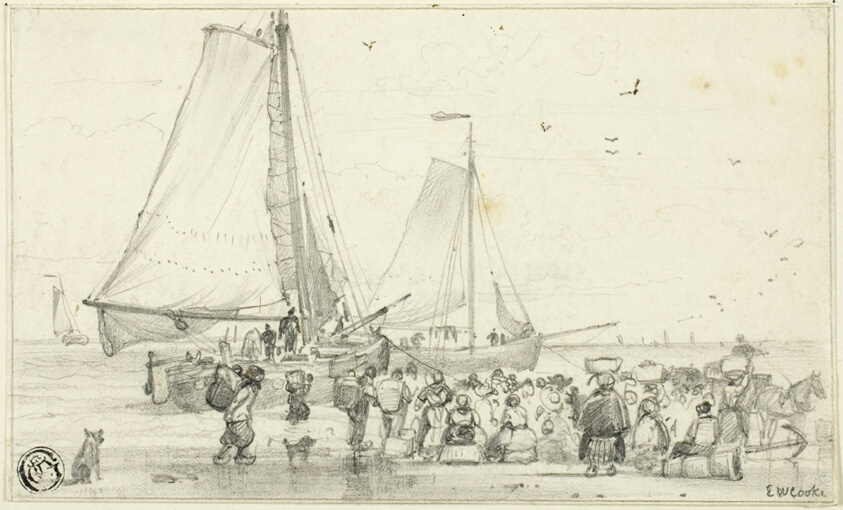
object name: Drawing and Watercolor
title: The Catch Coming In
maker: Edward William Cooke (English, 1811-1880)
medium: Graphite on ivory wove paper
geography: England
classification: graphite; drawings (visual works); prints and drawing